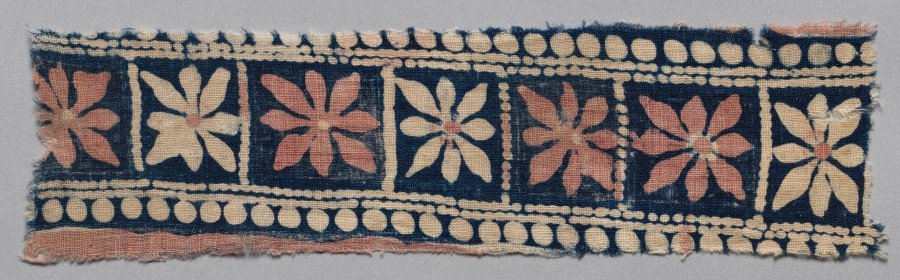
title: Fragment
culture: India, 15th century (?)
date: 1400s ?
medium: stamped resist, stamped mordant dyed; cotton ground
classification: Textile